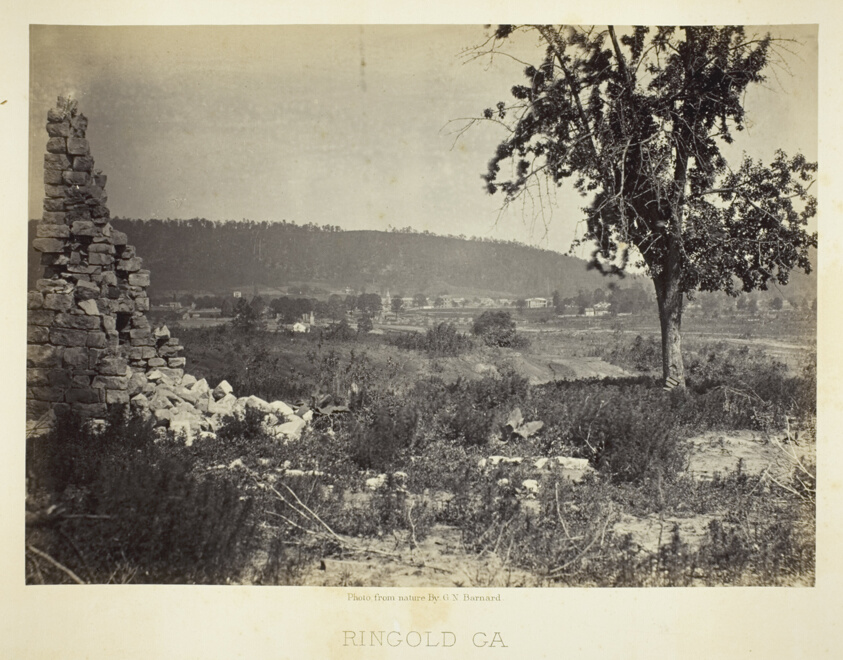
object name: Photograph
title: Ringold, GA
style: 19th century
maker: George N. Barnard (American, 1819–1902)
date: 1866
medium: Albumen print, plate 17 from the album "Photographic Views of the Sherman Campaign" (1866)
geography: United States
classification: albumen silver print; photographic process; photography; photograph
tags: Collected by Hugh Edwards, Sherman's Campaign 1866